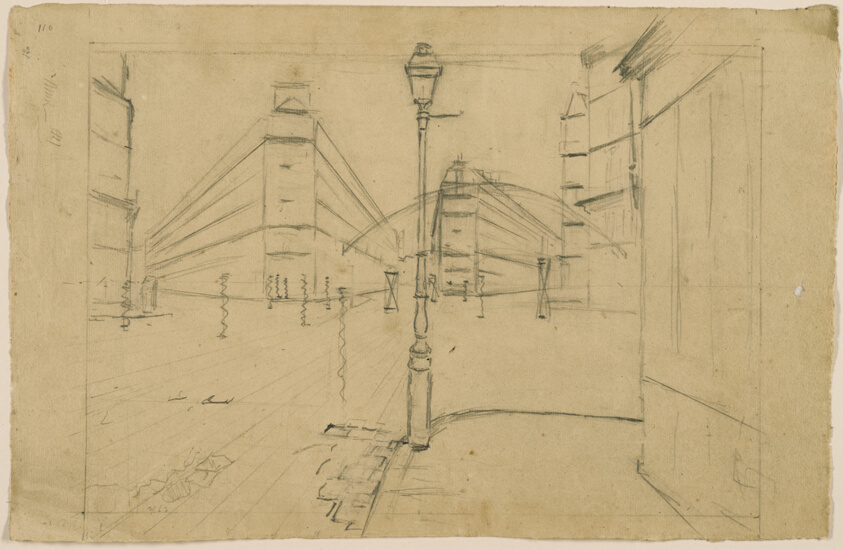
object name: Drawing and Watercolor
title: Study for Paris Street; Rainy Day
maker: Gustave Caillebotte (French, 1848-1894)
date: 1877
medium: Graphite, with touches of erasing and touches of charcoal, on tan, moderately thick, moderately textured handmade laid paper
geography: France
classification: graphite; prints and drawing; paper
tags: study, cityscapes